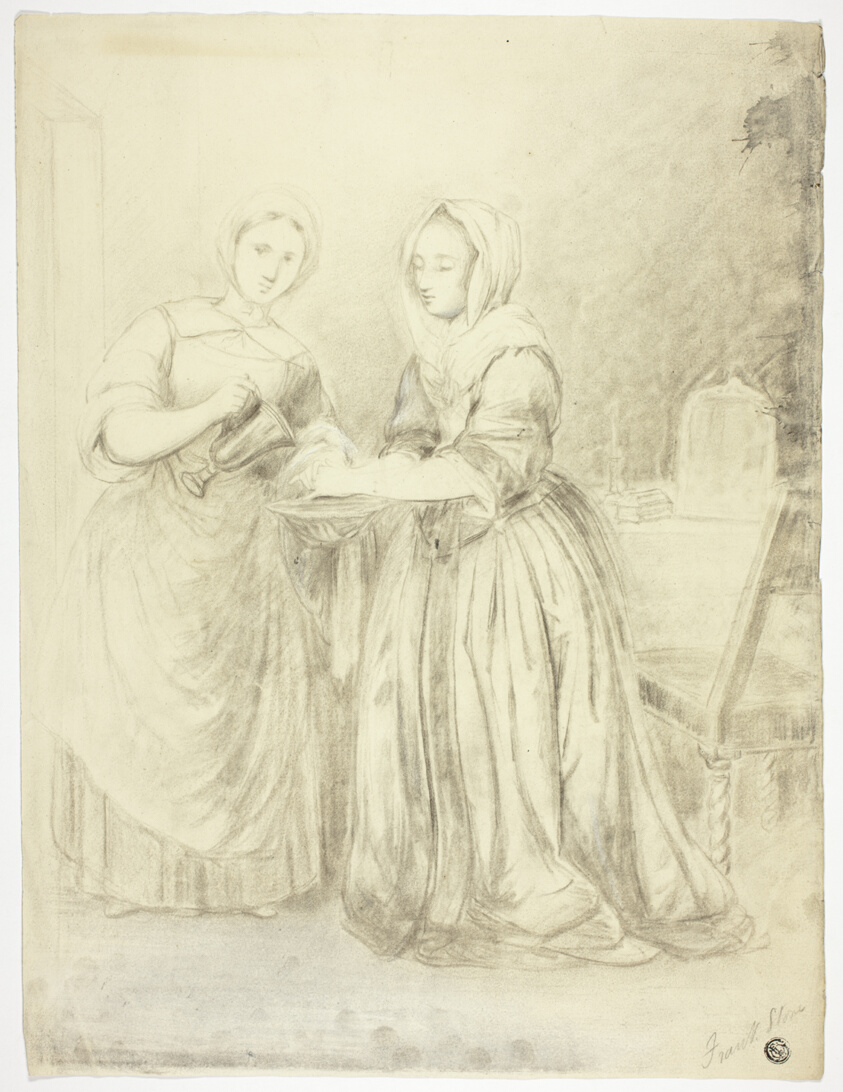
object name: Drawing and Watercolor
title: Washing of Hands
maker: Frank Stone (English, 1800-1859)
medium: Brown chalk, heightened with white chalk, on cream wove paper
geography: England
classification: chalk; drawings (visual works); prints and drawing; paper